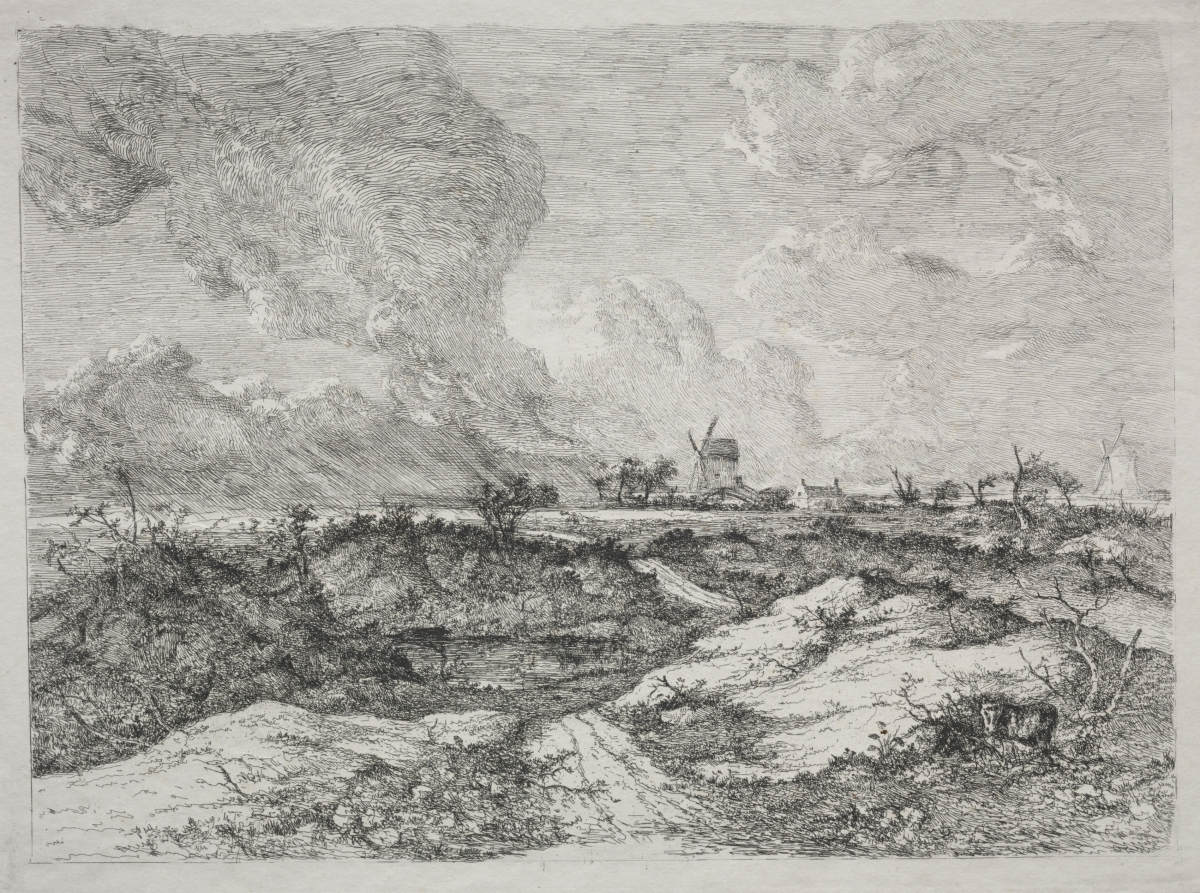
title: Mousehold Heath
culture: England, 19th century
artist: John Crome (British, 1768–1821)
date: c. 1810–13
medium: etching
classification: Print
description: As with most of Crome’s landscapes, the scenery depicted is located close to his Norwich home. Mousehold Heath, with its panoramic view and low-lying horizon, is the most dramatic of the artist’s thirty-three etchings. The foreground of untamed, uncultivated land is juxtaposed with windmills in the background, signs of man’s attempt to harness nature and make it complicit in its own taming and domestication. The stormy, windswept sky indicates the true character of such natural forces to be ultimately uncontrollable.